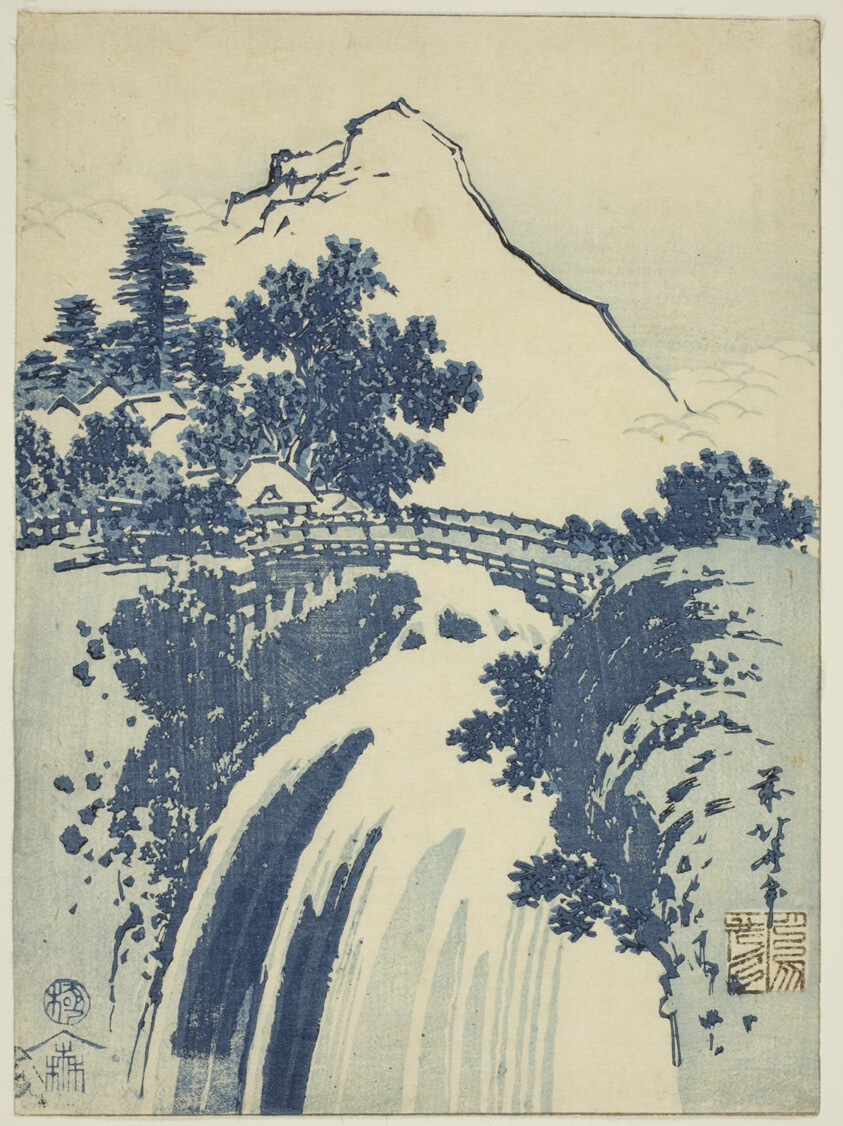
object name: Print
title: Landscape with waterfall, from an untitled series of chuban prints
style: Japanese (culture or style)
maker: Katsushika Hokusai 葛飾 北斎; Japanese, 1760-1849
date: c. 1831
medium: Color woodblock print; chuban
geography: Japan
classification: woodblock print; print; asian art